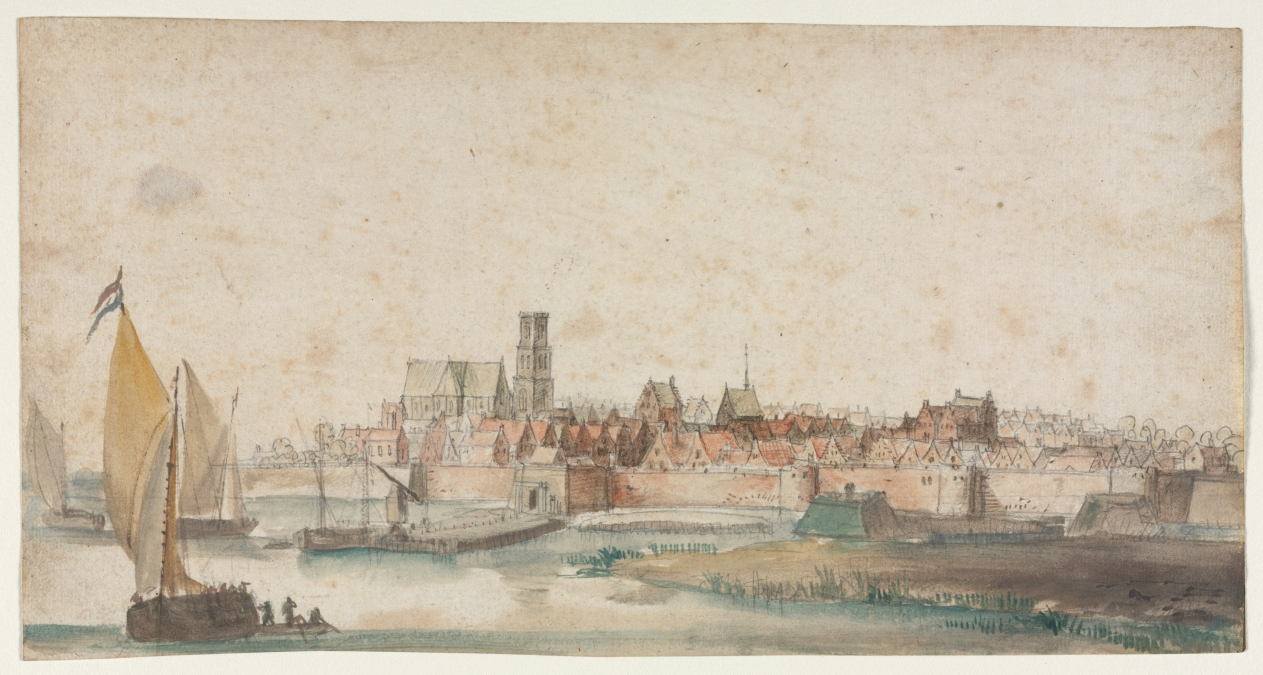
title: View of St. Geertruidenberg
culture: Netherlands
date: 1600s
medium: graphite, watercolor and gouache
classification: Drawing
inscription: SECONDARY SUPPORT (now removed): lower left, in brown ink: Hollar ; lower right, in brown ink: Hollar